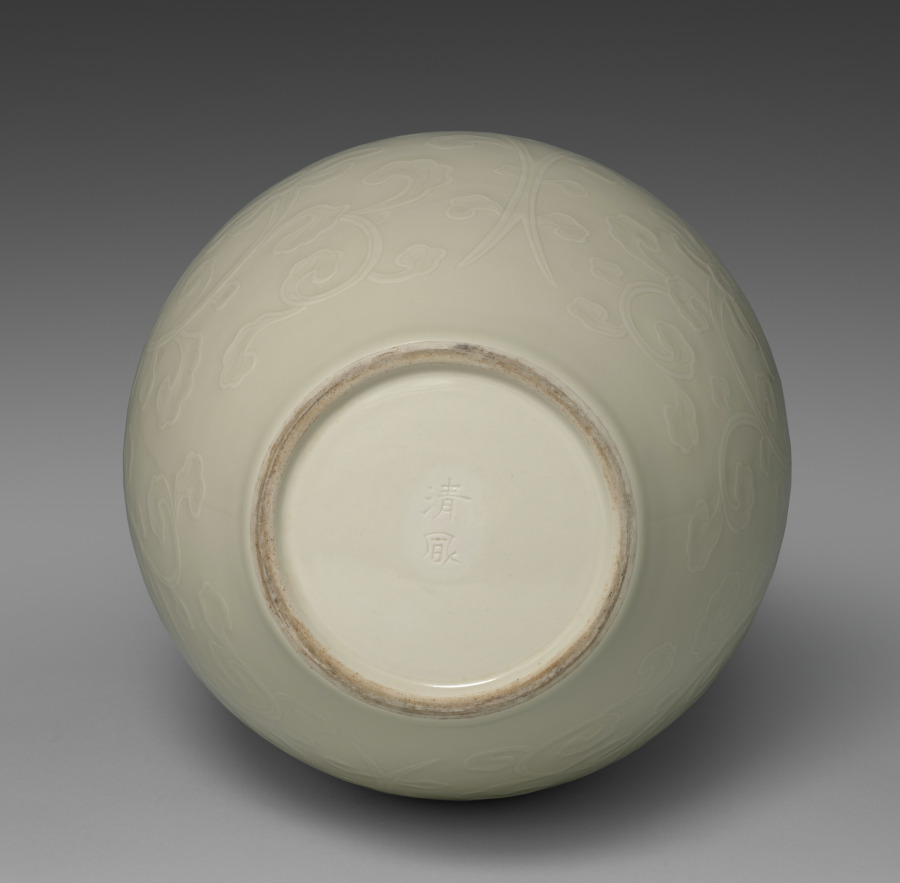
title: Guan-Shaped Vessel with Floral Scroll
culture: Japan, Taishō period (1912–26) or Shōwa period (1926–89)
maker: Seifū Yohei IV (Japanese, 1872–1951)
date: 1914–46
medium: Porcelain with molded and carved design and cream glaze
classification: Ceramic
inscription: 清風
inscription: 清風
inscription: 清風造之 【印】成山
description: Many of the vases created by Yohei III and IV were made with reference to and in emulation of Chinese ceramics in both form and glazing. The Seifu studio was inspired by later Chinese copies of two other archaic vessel types, the hu (Japanese ko) and guan (Japanese kan). In simple terms, in their original contexts, the hu and guan were storage jars that also appeared in ritual contexts. This hefty guan-shaped vase by Yohei IV has a floral scrolling pattern known in Japanese as karakusa, or “Chinese grasses.” The flowers are generally identified as lotus or peony. This flower vase might alternately be categorized as having the form of what is called a shukaiko in Japan, or a large vessel for holding wine. Shukaiko were created as early as the latter part of the Kamakura period after Yuan dynasty examples.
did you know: According to the box lid, the vase is a kanpakuji, "bright-jewel white porcelain," work.